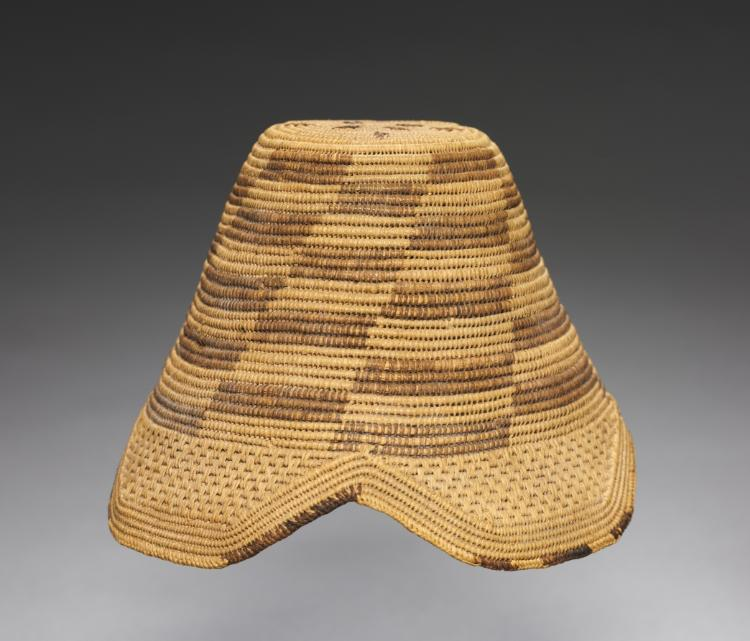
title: Hat (laket) with Pin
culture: Africa, Central Africa, Democratic Republic of the Congo, Kuba-style maker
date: Early 1900s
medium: Raffia, dye, and metal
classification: Garment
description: Titled Kuba men and prominent women wear the laket, a small ornate dome-shaped hat. An essential fashion item of adult men in good social standing, it focuses special attention on the head as a significant marker of individual identity, ethnic affiliation, status, and role in society. This prestige object is secured on the crown of the head with a nine-and-a-half-inch metal pin that pierces through the hat onto a clump of hair. The laket is made from raffia palm fiber coiled into threads and woven in two alternating patterns and contrasting light and dark (dyed) wefts. There are two examples of the laket: the plain type with the flat top, and the more elaborate type called the laket mishiing.